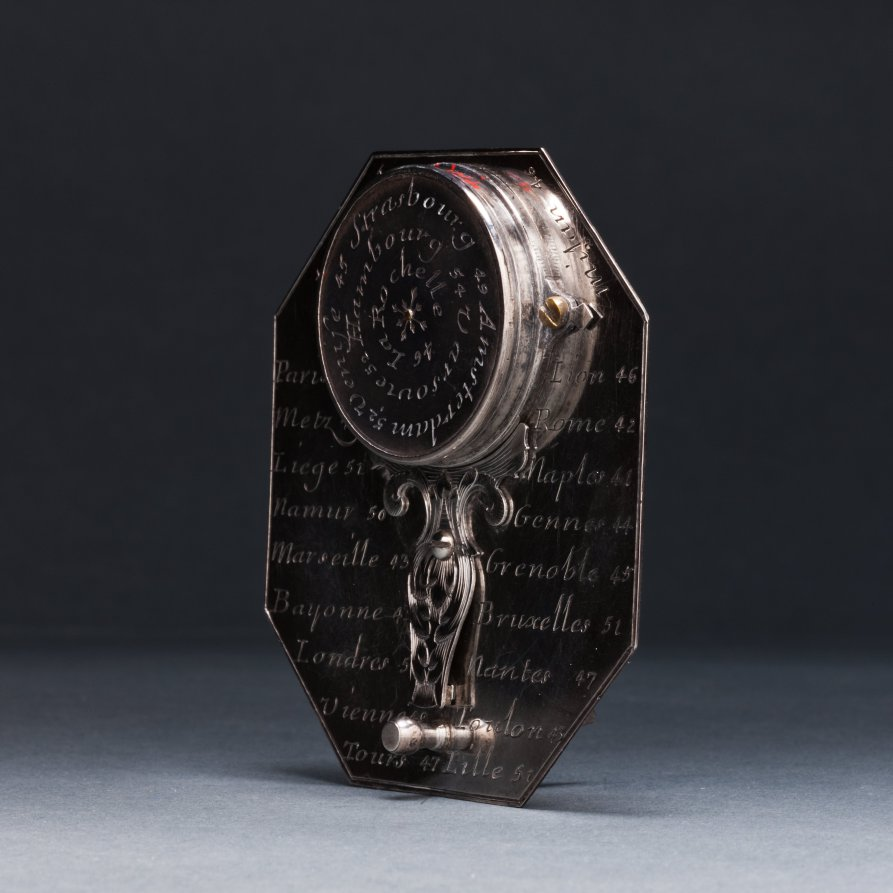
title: Butterfield Sundial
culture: France, 18th century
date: 1700s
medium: silver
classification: Silver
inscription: [Engraved signature above the compass in ribbon band]: "N. BION A Paris"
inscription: [Engraved on the face of the sundial]: “Pour 55° 4-5-6-7-8-9-10-11 50° IIII-V-VI-VII-VIII-IX-X-XI 45° 5-6-7-8-9-10-11 40° -VI-VII-VIII-IX-X-XI'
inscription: [Engraved on the other side]: "Pour 55° -8-7-6-5-4-3-2-1-0 50°-VIII-VII-VI-V-IIII-III-II-I 45°-8-7-6-5-4-3-2-1 40°-VII-VI-V-IIII-III-II-I"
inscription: [Engraved around the compass]: “NORD-OUEST-SUD-EST”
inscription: [Engraved on the back of the sundial]: “Turin 44 Milan 46 Paris 49 Lion 46 Metz 49 Rome 42 Liege 51 Naples 44 Namur 50 Gennes 44 Marseille 43 Grenoble 45 Bayonne 43 Bruxelle 51 Londres 52 Nantes 47 Vienne 48 Toulon 43 Tours 47 Lille 51”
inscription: [Engraved around the back of the compass]: “Venise 45 Strasbourg 49 Amsterdam 52 Hambourg 54 Varsovie 52 La Rochelle 46”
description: Butterfield-type sundials are characterized by their adjustable gnomons, metal flaps that cast a shadow on the dial’s face to indicate the hour, and geographical indices. This sundial has a scale adjustable between latitudes of 40° to 60° north. The latitudes of 26 European towns are engraved on its back for quick reference. With an intricately engraved silver face, it would have functioned as a fashionable traveler’s accessory.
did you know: Butterfield-style sundials were named after Micheal Butterfield, an English scientific and mathematical instrument maker who worked in Paris between 1674 and 1724.